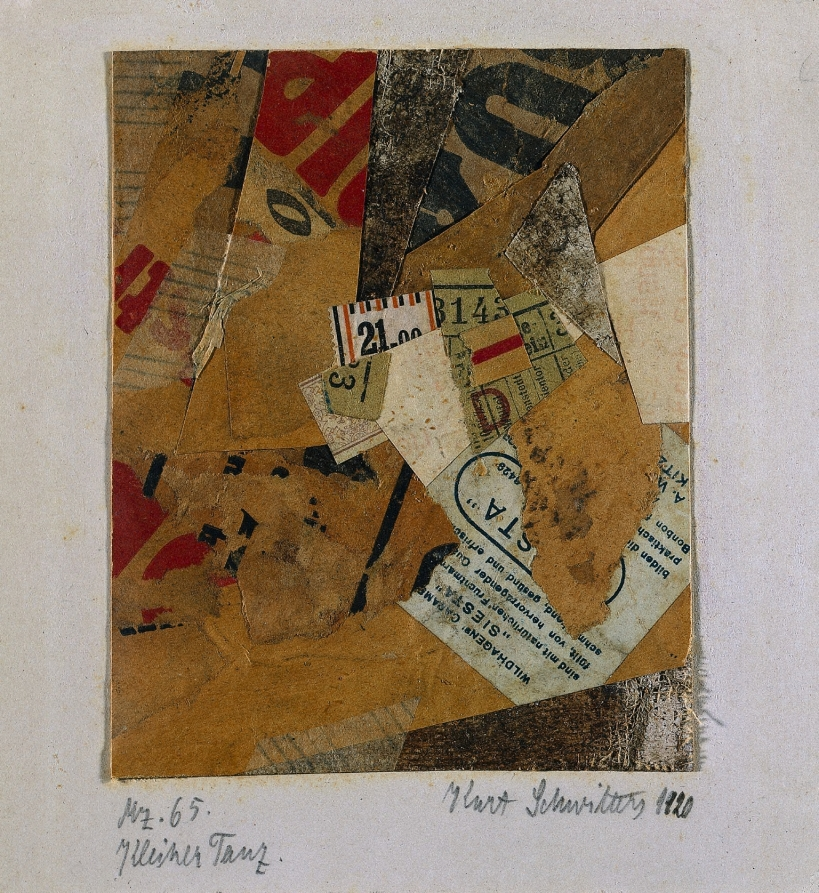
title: Little Dance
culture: Germany, 20th century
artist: Kurt Schwitters (German, 1887–1948)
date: 1920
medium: collage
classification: Drawing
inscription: SECONDARY SUPPORT, signed, lower right, in graphite: Kurt Schwitters 1920 ; by artist, lower left, in graphite: Mz. 65. / Kleiner Tanz. ; lower left, in graphite: 1967 ; VERSO OF SECONDARY SUPPORT, by artist, in top half: Kurt Schwitters / Hannover / [Waldmansustr?] 5II [II in superscript] ; upper left, in graphite: VI [underlined] 3 ; across center, in graphite: H__34201/VdMERZ/ ; upper right, in graphite: [paritally erased, illegible] ; lower right, in graphite: [partially erased, illegible] / [partially erased, illegible] ; lower right, in graphite: OUTSIDE O[N] / BACK / Janis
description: With collages of densely interwoven scraps of paper gleaned from daily life, Schwitters produced dynamic compositions in which the interaction of the materials becomes a kind of dance. Notice here the way the color red "dances" among the subdued tones of white, gray, and ochre.